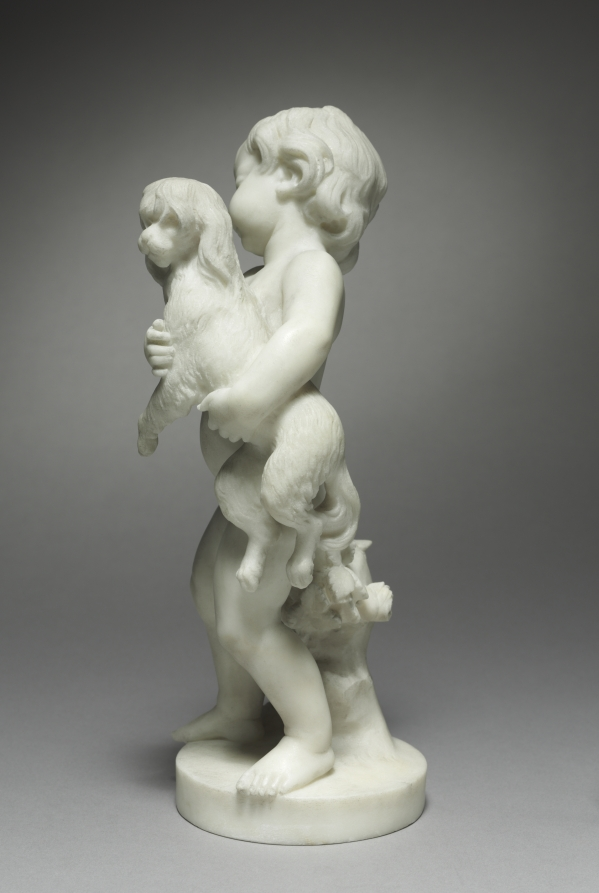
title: Faithful Love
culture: France, 19th century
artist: after Augustin Pajou (French, 1730–1809)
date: 1800s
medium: marble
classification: Sculpture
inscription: signature behind stump with roses: Pajou f(ecit) 1787.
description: These statuettes represent the opposing spectrums of love—fickle and faithful—both portrayed by Cupid. Fickle Love absent-mindedly plays with a butterfly, a symbol of the fleeting moment. Conversely, Faithful Love is accompanied by a dog, the ultimate loyal companion. These works were originally believed to be by the hand of Augustin Pajou, because the works are signed and he made nearly identical sculptures. However, due to the slightly clumsy execution and the awkward scale of the signatures, the museum now believes the statuettes were created by another artist after Pajou's design.